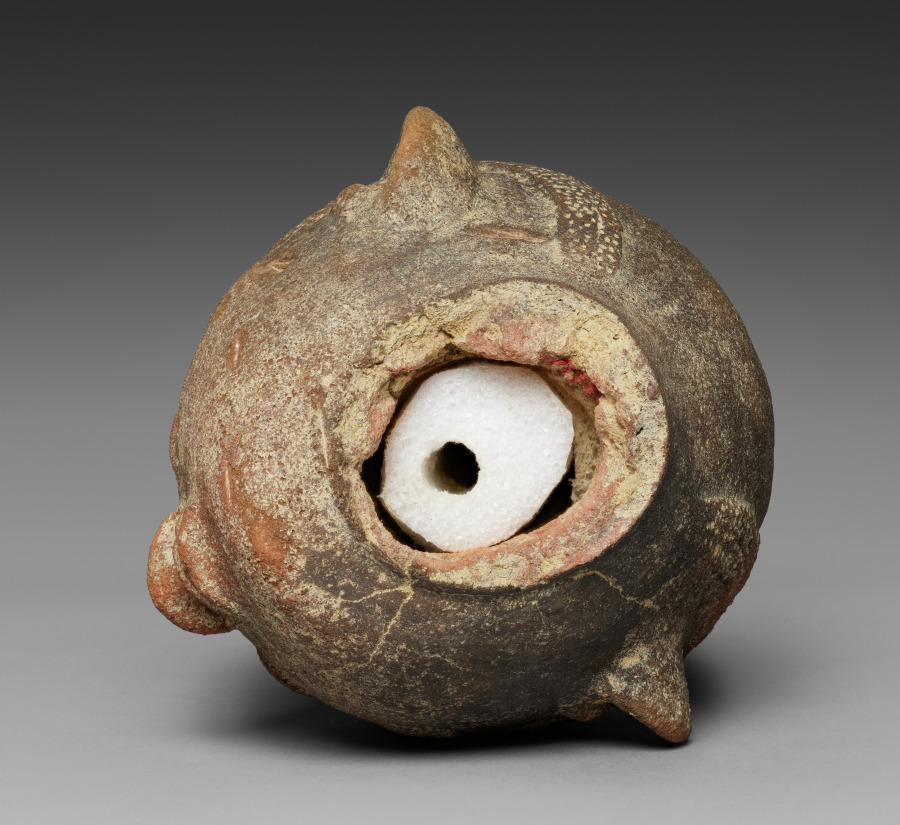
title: Memorial head (nsodie)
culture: Ghana, Akan-style sculpture, unknown female ceramicist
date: late 1600s–early 1700s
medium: Terracotta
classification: Sculpture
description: This is an idealized portrait of an Akan royal. The Akan states formed in West Africa around the 1400s. Akan royal family members commissioned terracotta portraits like this from female artists during someone’s life. Following their death and burial, the family placed these sculptures in a sacred grove. The woman who sculpted this head over 300 years ago worked from memory, without sketches. The resulting sculpture combined idealized physical qualities of elite figures with individual details. The hairstyle and skin color of this portrait reflect its subject’s individuality. In contrast, his calm expression reflects the desired “cool composure” of elites.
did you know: The woman who sculpted this head did so without making a sketch, working from her memory of the subject.